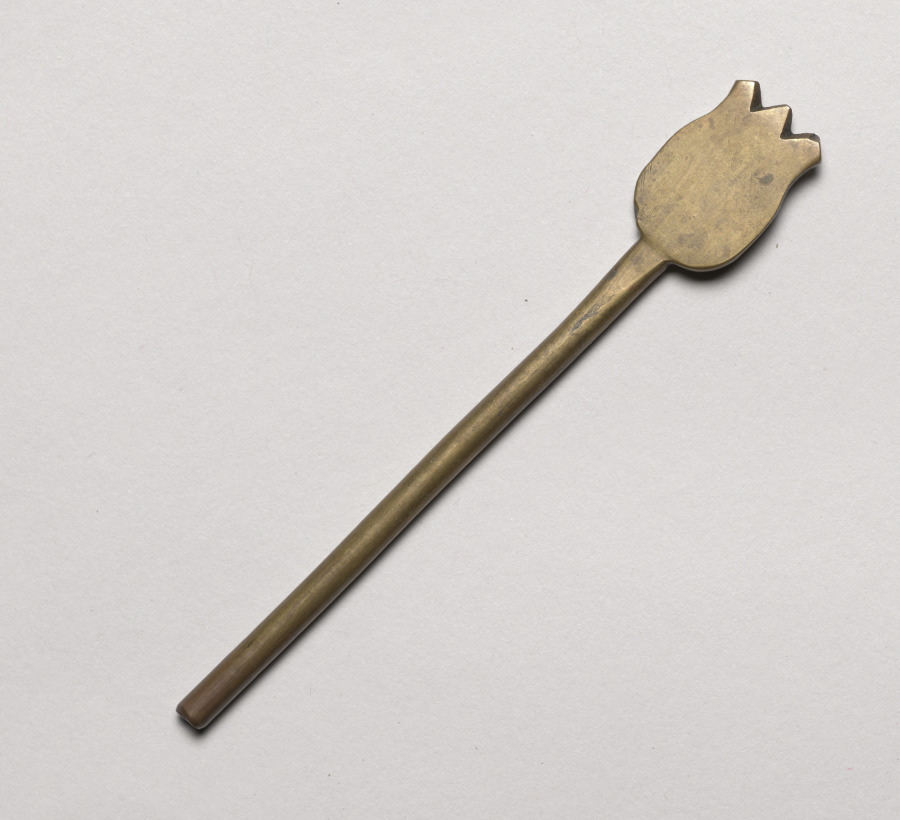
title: Door Pin for Cupboard of a Double Cabinet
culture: China, Ming dynasty (1368-1644) - Qing dynasty (1644-1911)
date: 1600s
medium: Metal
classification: Furniture and woodwork